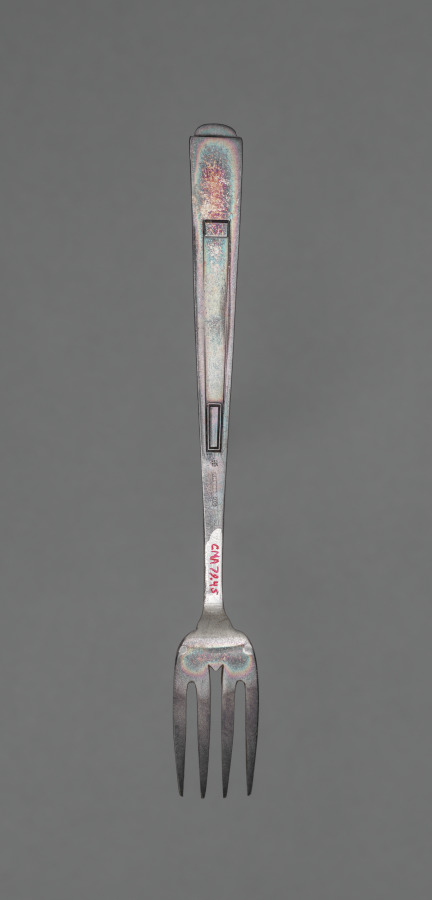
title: Fish Fork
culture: Germany, late 19th-early 20th Century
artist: Josef Maria Olbrich (German, 1867–1908)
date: c. 1900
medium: silver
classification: Silver